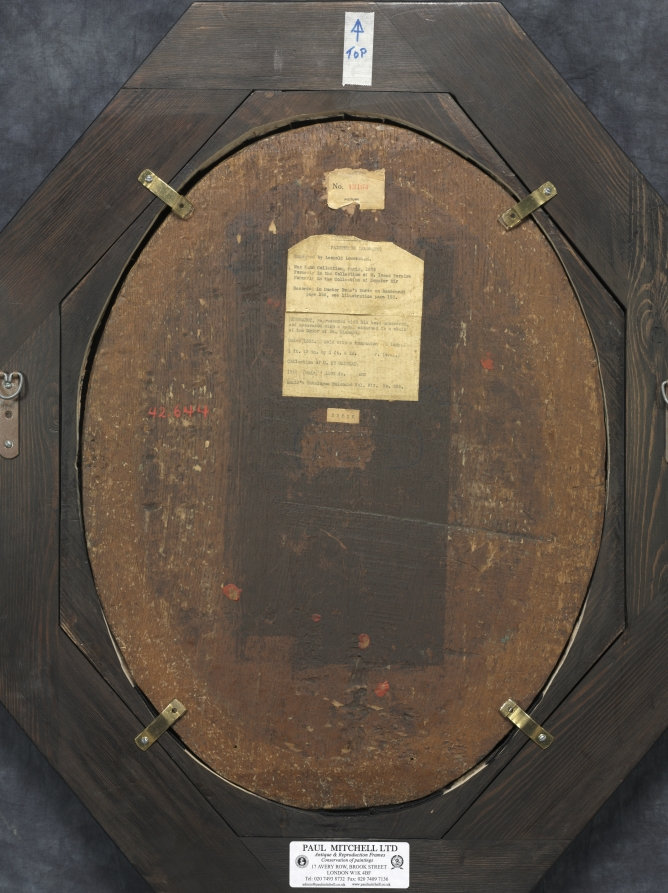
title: A Young Man with a Chain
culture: Netherlands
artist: Rembrandt van Rijn (Dutch, 1606–1669)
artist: and Studio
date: c. 1629 or 1632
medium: oil on wood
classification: Painting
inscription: Signed at right: "RHL van Rijn / 1632 [RHL in monogram]"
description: This painting is an example of a tronie, a Dutch word meaning “head” or “facial expression.” Tronies were not intended to be identifiable portraits, but artistic investigations of facial appearance and fanciful costume. Particularly in the years around 1630, Rembrandt used this popular format to explore different lighting effects and facial expressions. Here, the strong contrast of light and shade shapes the contours of the young man’s face; unusual accessories such as the striped scarf and glittering pendant on a jeweled chain add an exotic touch. Although this painting bears Rembrandt’s monogram, the authorship is not certain. Some scholars have attributed it to Isaac de Joudreville (1613–1648), a pupil and associate of Rembrandt who painted comparable tronies in a similarly smooth and elegant style.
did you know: Once identified as Rembrandt himself, the sitter is now considered an anonymous study of human character.